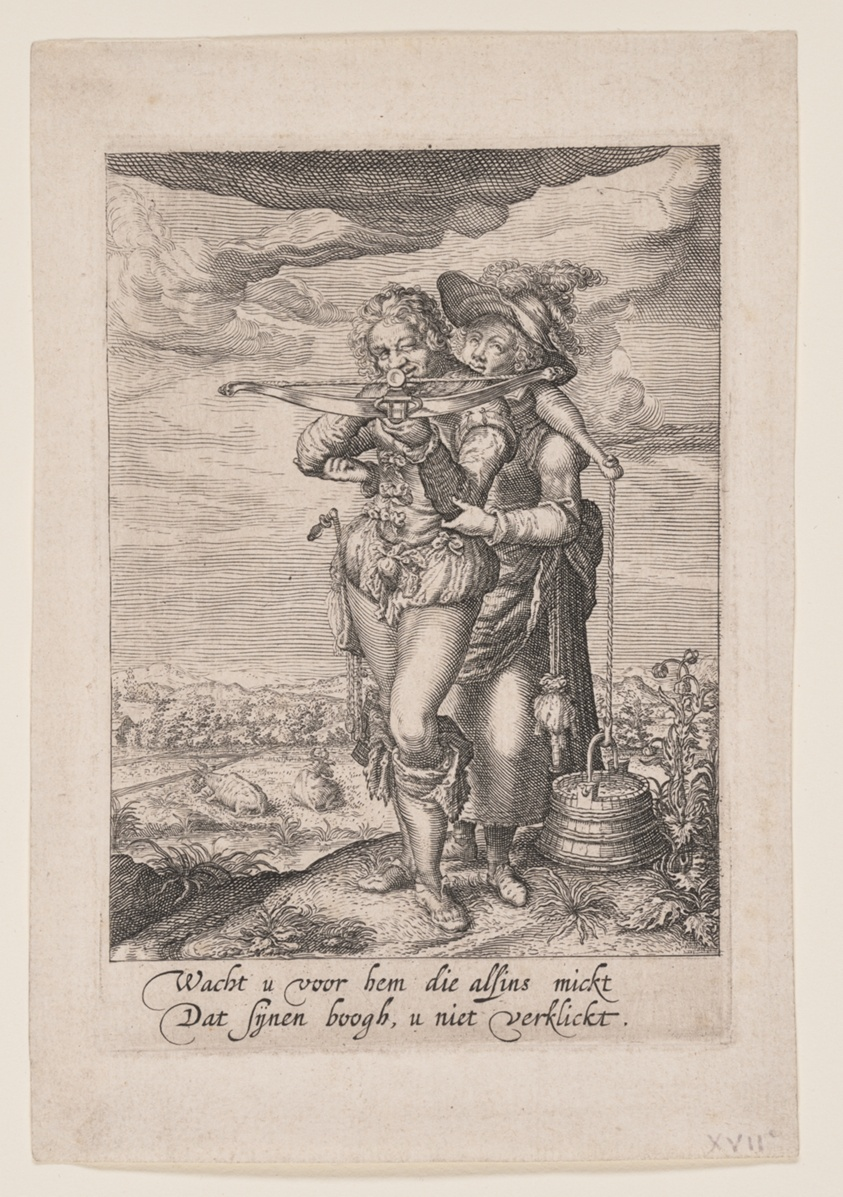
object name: Print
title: The Archer and the Milkmaid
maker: After Jacques de Gheyn II; Dutch, 1565–1629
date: after 1610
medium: Engraving on paper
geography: Netherlands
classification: engraving; paper; print; prints and drawing